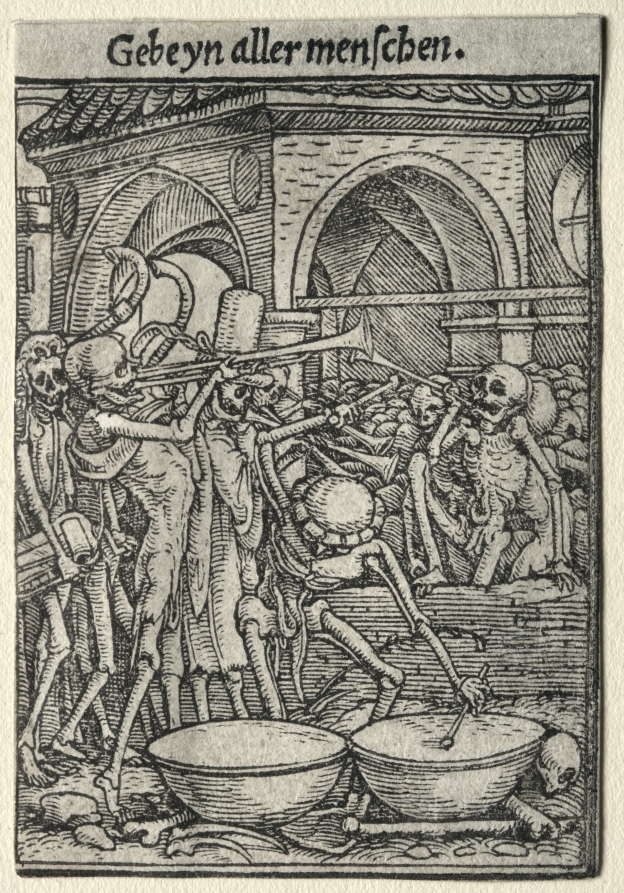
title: Dance of Death: The Trumpeters of Death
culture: Germany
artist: Hans Holbein the Younger (German, active England and Switzerland, 1497/98–1543)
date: c. 1526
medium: woodcut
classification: Print